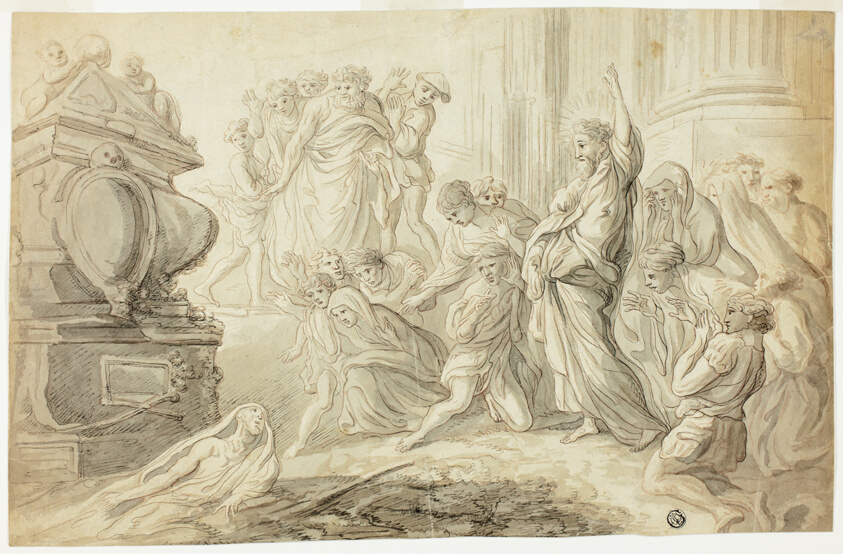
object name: Drawing and Watercolor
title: Raising of Lazarus (recto); Travelers with Cart Outside Inn (verso)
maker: Unknown Artist (German, 18th century); after Giovanni Benedetto Castiglione (Italian, 1609-1664)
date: 1700/99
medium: Pen and black ink, and red chalk, with brush and gray wash (recto), and brush and black ink and black wash (verso), on cream wove paper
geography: Germany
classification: ink or chalk wash; drawings (visual works); prints and drawing